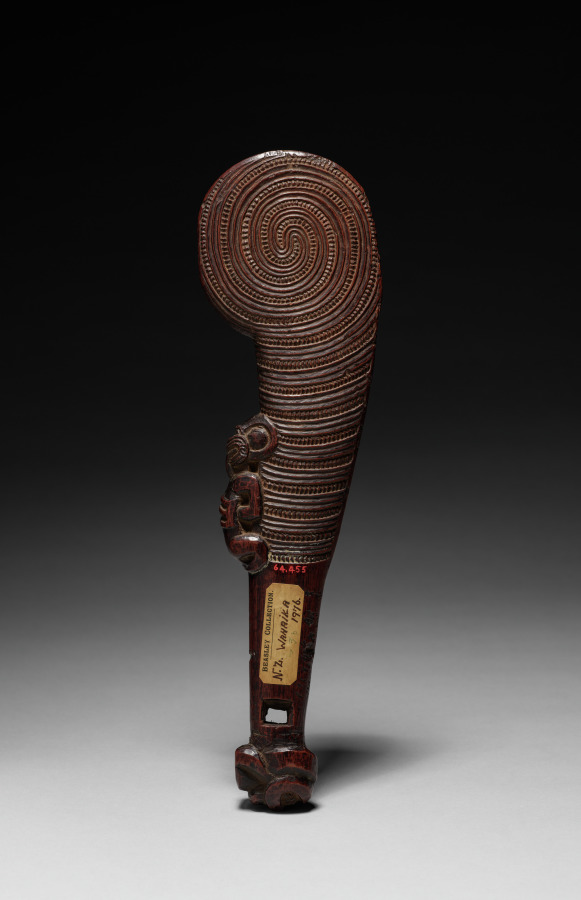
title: Short Club (Wahaika)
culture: Polynesia, New Zealand, Maori people, mid-19th Century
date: mid 1800s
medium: wood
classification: Sculpture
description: The wahaika, carried in a belt, was used by the Maori in hand-to-hand combat. Early, undecorated clubs were made of stone. Bone and wood clubs were decorated with increasingly complex carved designs. The small figure clinging to the side of this club may well represent the supernatural power (mana) of the weapon, while the face at the end of the grip expresses the aggression of combat.